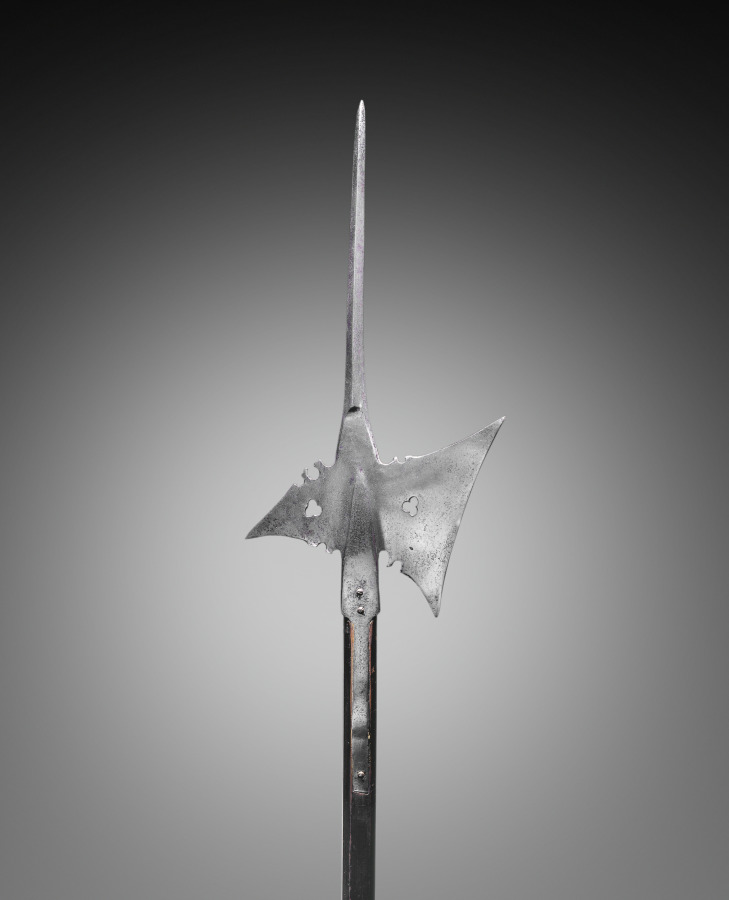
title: Halberd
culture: Germany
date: c. 1550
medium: steel, with pierced trefoils; wood haft (rectangular with planed corners)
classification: Arms and Armor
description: The most effecient weapons used by the infantry (foot soldiers) during the 15th and 16th centuries were pole arms (or staff weapons). The halberd, like the examples shown here, was a weapon of great versatility. The word halberd comes from the German words Halm (a staff) and Barte (an axe). The halberd is, in fact, an axe mounted on a long pole with a very specialized shape and function: the axe blade was used for hacking, the spike for thrusting, and the beak either for piercing plate armor or for pulling a knight from his saddle. Used by shock troops, the halberd was the weapon of choice for Swiss and German mercenaries. From about 1550 onward, the halberd underwent major changes. Its distinctive outline became exaggerated and its functional elements evolved into purely ornamental shapes. The halberd's large blade conveniently provided space for armorial devices. By the late 1500s, it became a ceremonial weapon favored by princely body guards. It is still carried today by the Swiss Guard at the Vatican.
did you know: The lives of both Leopold III, Duke of Austria, and Charles the Bold, Duke of Burgundy, were ended by a halberd strike.